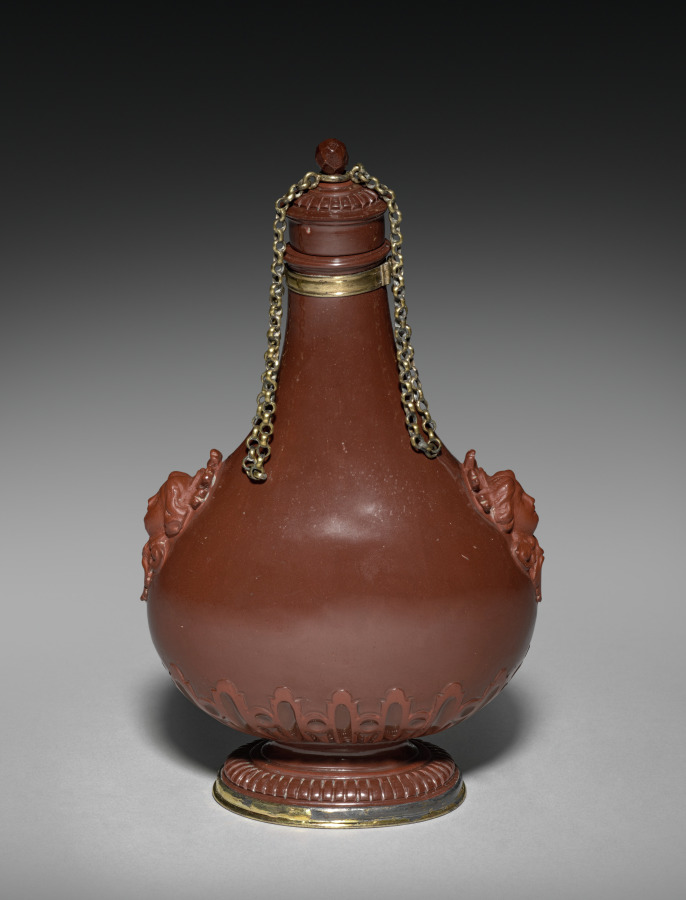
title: Pilgrim Bottle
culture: Germany, Meissen, 18th century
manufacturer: Meissen Porcelain Factory (German, est. c. 1710)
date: c. 1715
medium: polished red stoneware, silver-gilt mounts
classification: Ceramic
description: Throughout the early 1700s porcelain was imported to Europe from China and Japan, until the correct formula to produce it was developed by Johann Friedrich Böttger and a collaborator, which led to the establishment of the Meissen factory in 1710. Red stoneware inspired by Chinese Yixing ware and white porcelain were produced in Meissen under Böttger. Its fine red stoneware was so hard that it could be polished on a lapidary’s wheel—as was the body of this bottle.